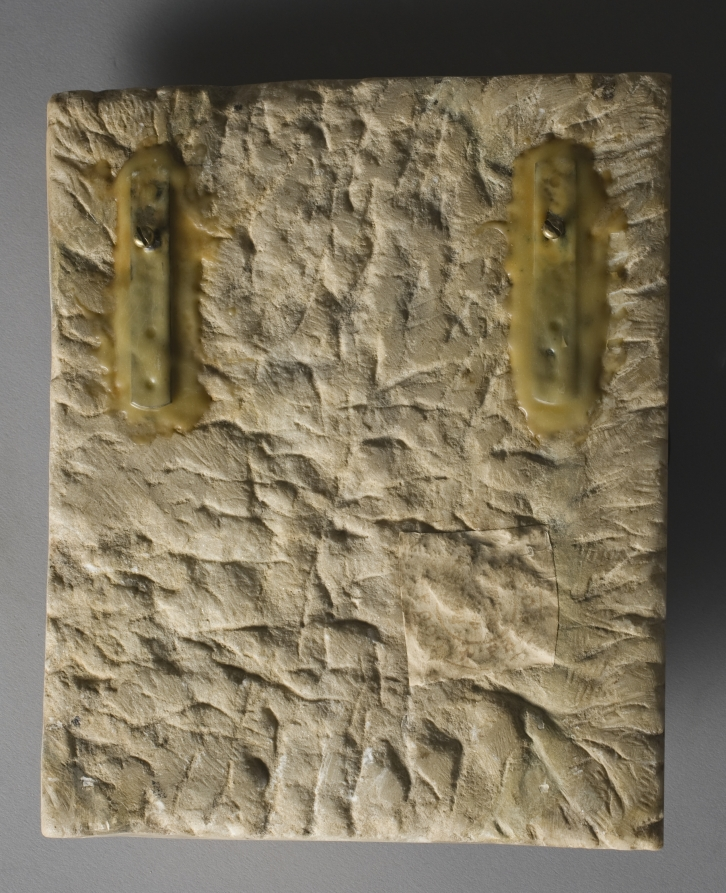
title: Head of a Boy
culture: Italy, Florence, 15th century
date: c. 1460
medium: marble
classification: Sculpture